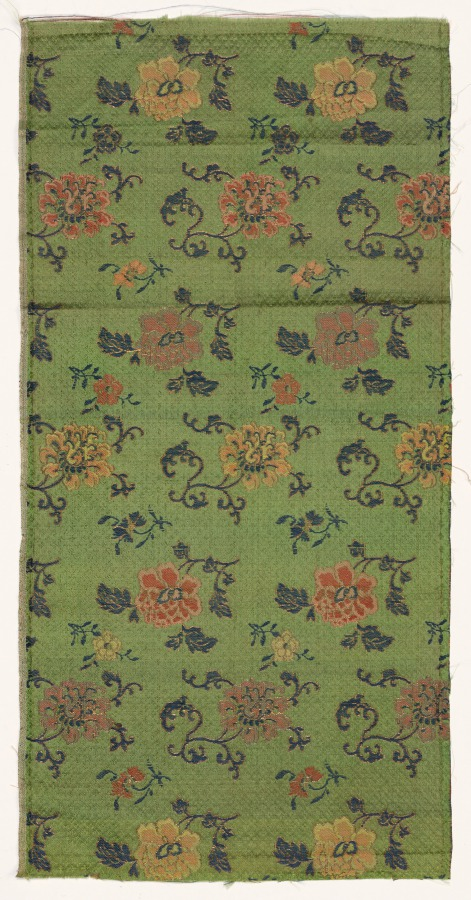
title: Fragment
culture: China, 19th century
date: 1800s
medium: silk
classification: Textile